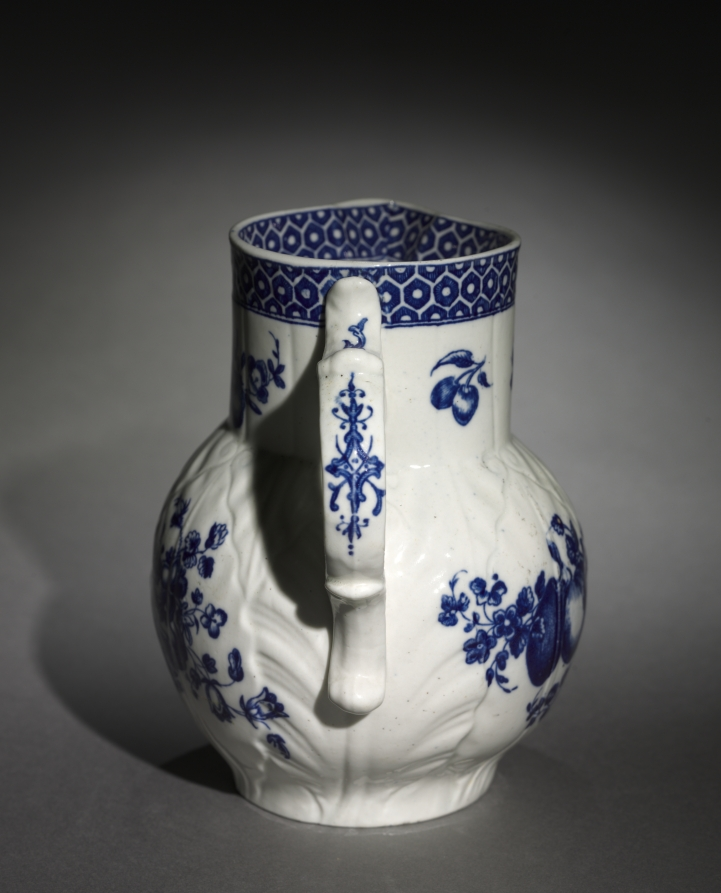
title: Pitcher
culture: England, 18th century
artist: Worcester Porcelain Factory (British, established 1751)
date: c. 1750–70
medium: porcelain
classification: Ceramic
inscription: Half moon mark on the bottom.